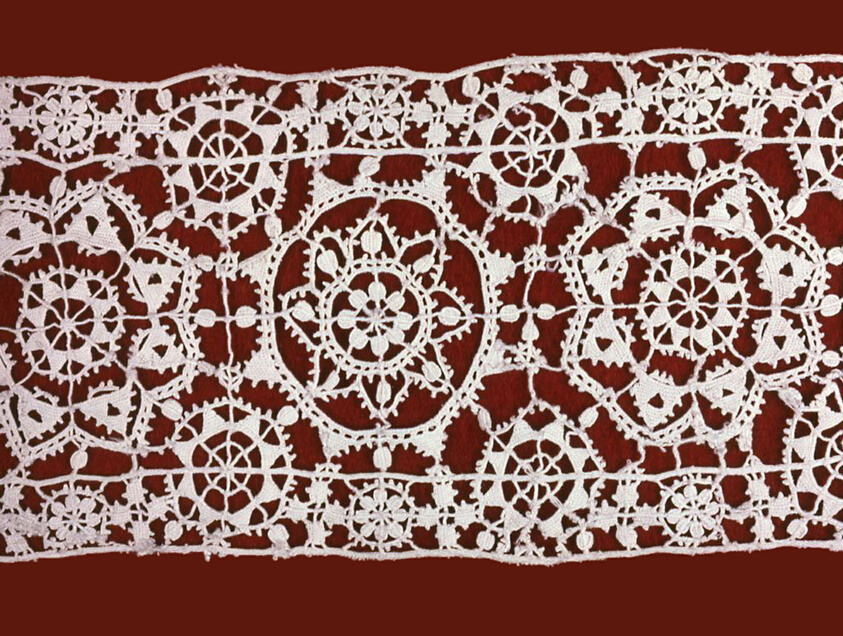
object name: Textile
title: Insertion (For a Cover)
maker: Italy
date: 1601/25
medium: Linen, needle lace worked on a laid and plaited thread grid, Reticello pattern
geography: Italy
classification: textile; lace - needle